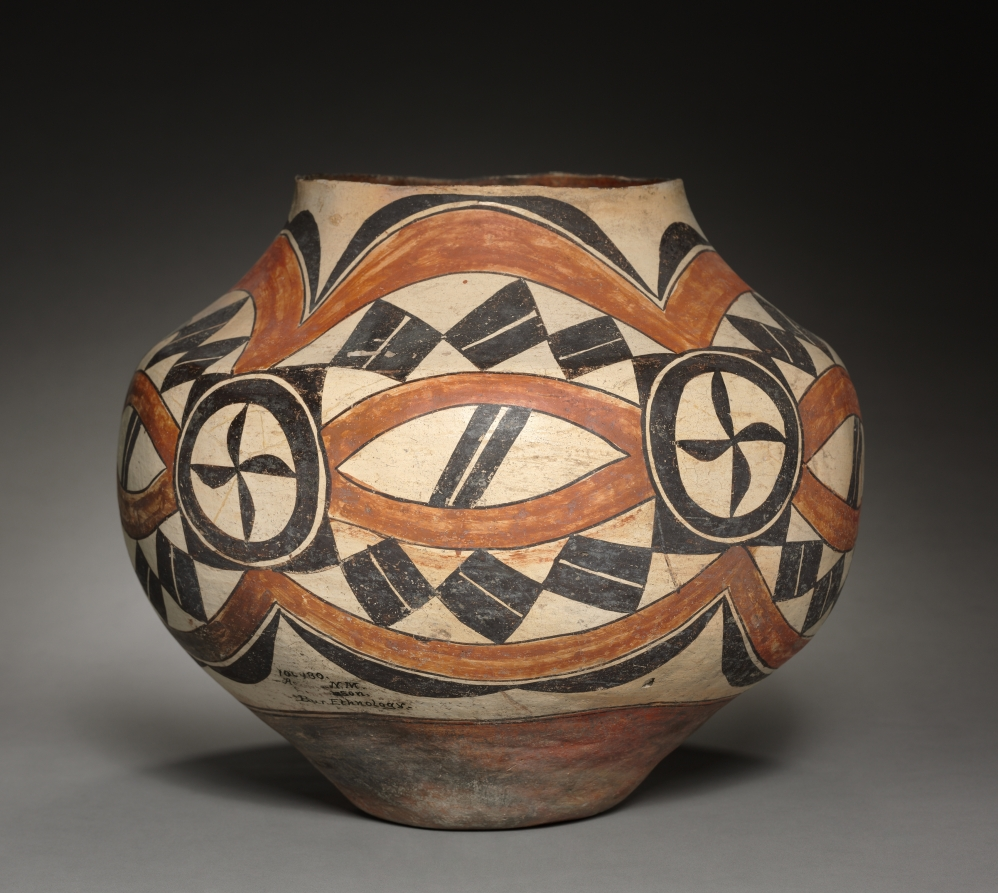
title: Jar (Olla)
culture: Southwest, Pueblo, Acoma, Laguna, Post- Contact Period,19th century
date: 1875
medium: pottery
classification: Ceramic